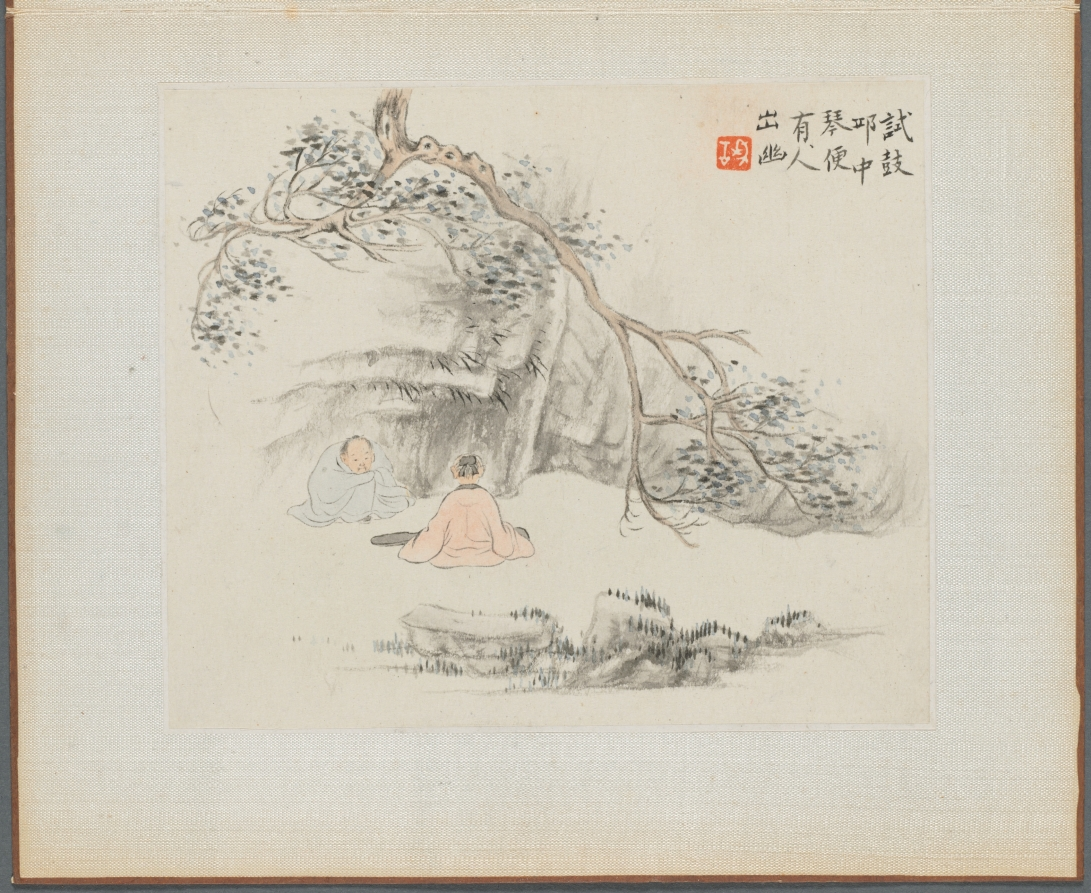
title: Album of Landscape Paintings Illustrating Old Poems: Listening to the Qin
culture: China, Qing dynasty (1644–1911)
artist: Hua Yan (Chinese, 1682–c. 1765)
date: 1745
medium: album leaf; ink and light color on paper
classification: Painting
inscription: 試鼓邱中琴，便有人出幽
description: The figure in pink is playing a qin, a seven-stringed zither. The sound of the musical instrument symbolizes the harmony between humanity and nature; literati are often depicted playing qin in landscape settings.